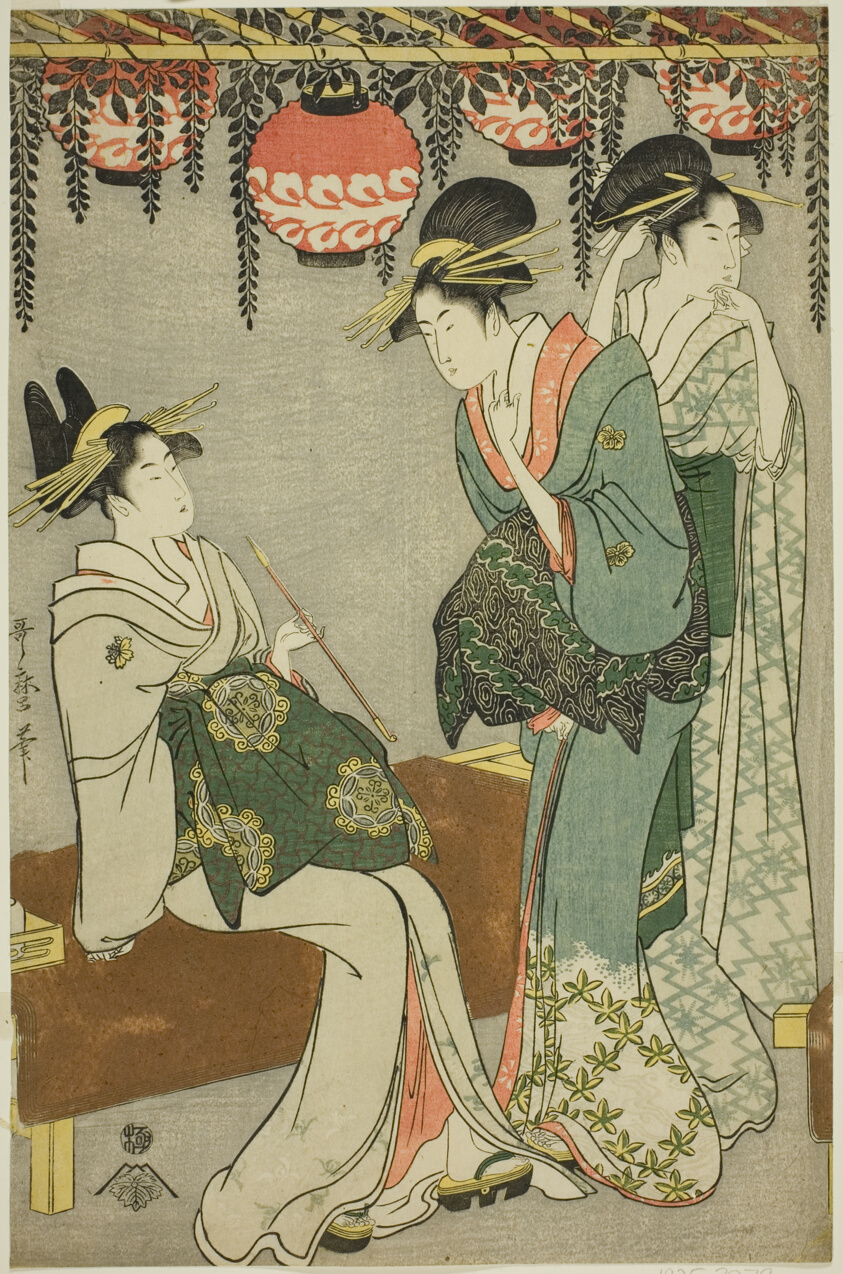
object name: Print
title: Courtesans beneath Wisteria Arbor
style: Japanese (culture or style)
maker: Kitagawa Utamaro 喜多川 歌麿; Japanese, 1753 (?)-1806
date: c. 1795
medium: Color woodblock print; left sheet of oban triptych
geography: Japan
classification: woodblock print; print; asian art